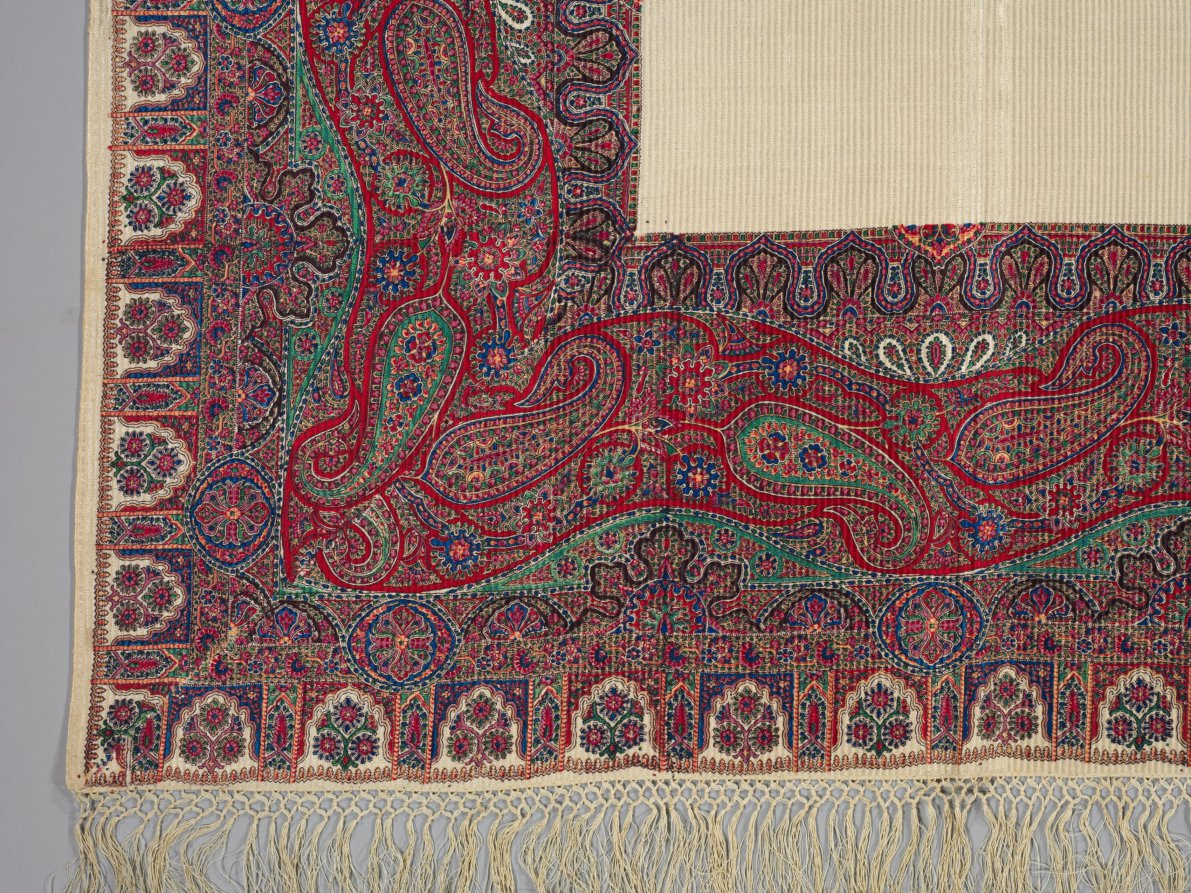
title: Printed Silk Turnover Shawl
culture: France, 19th century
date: 1835–1840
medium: silk; woven and printed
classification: Textile